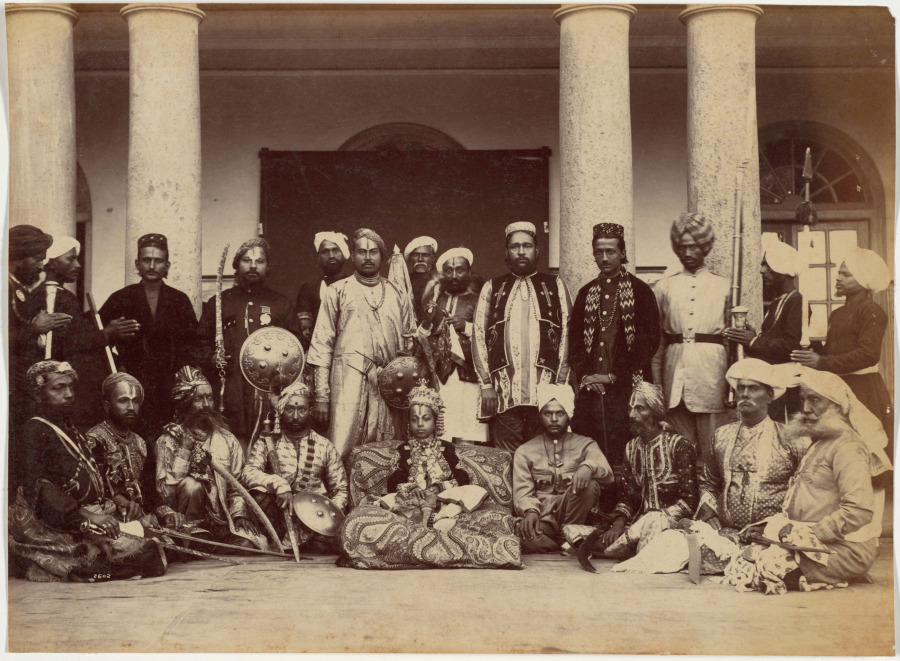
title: Maharaja of Rewa and Sardars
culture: India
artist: Raja Deen Dayal (Indian, 1844–1905)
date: 1886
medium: albumen print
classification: Photograph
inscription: No visible inscriptions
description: Deen Dayal uses the arrangement of people and the architecture to point to the most important person in the photograph. Here, the Maharaja of Rewa is placed front and center. “Sardars,” inscribed on the top picture’s mount, refers to the military officials surrounding him. After 1858, British influence dictated that Indian rulers be educated in European history and ideas as well as their local culture and history. In the bottom image, the young maharaja is shown with Indian teachers, but the instructional tools are Western: bound books and a raised relief globe (with Asia visible).